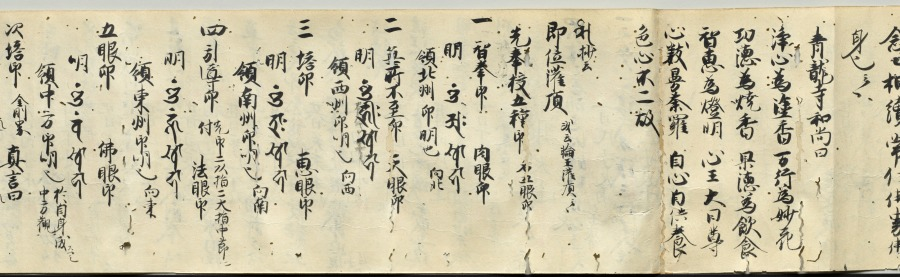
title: Scroll of Miscellaneous Notes written on a Calendar by Priest Seigen (recto)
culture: Japan, Kamakura period (1185–1333)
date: c. 1200–1231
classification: Manuscript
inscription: bears miscellaneous notes written by Priest Seigen.